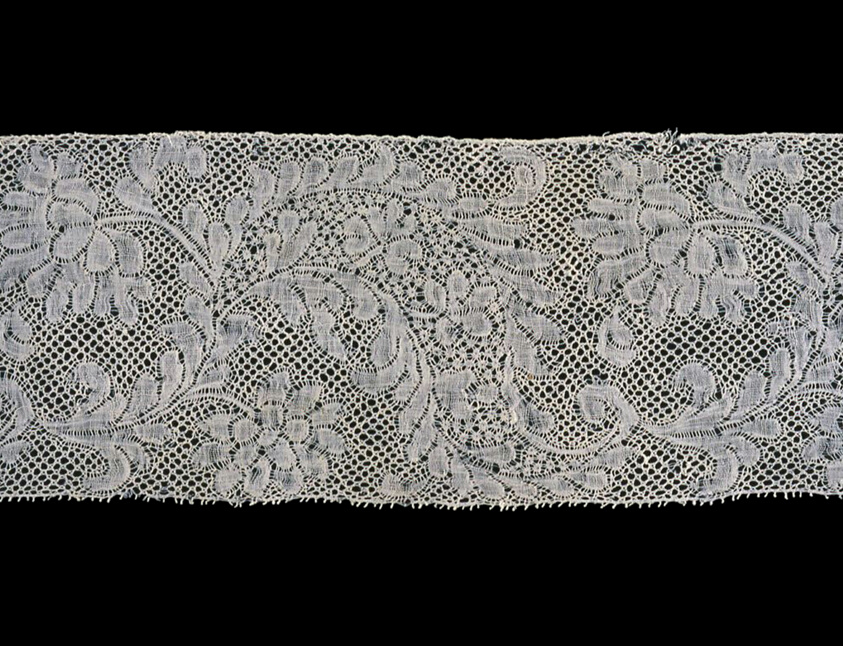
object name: Textile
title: Border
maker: France, Valenciennes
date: 1725/50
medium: Linen, bobbin straight lace of a type known as "Valenciennes" with a five hole mesh ground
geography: France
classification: textile; lace - bobbin; lace